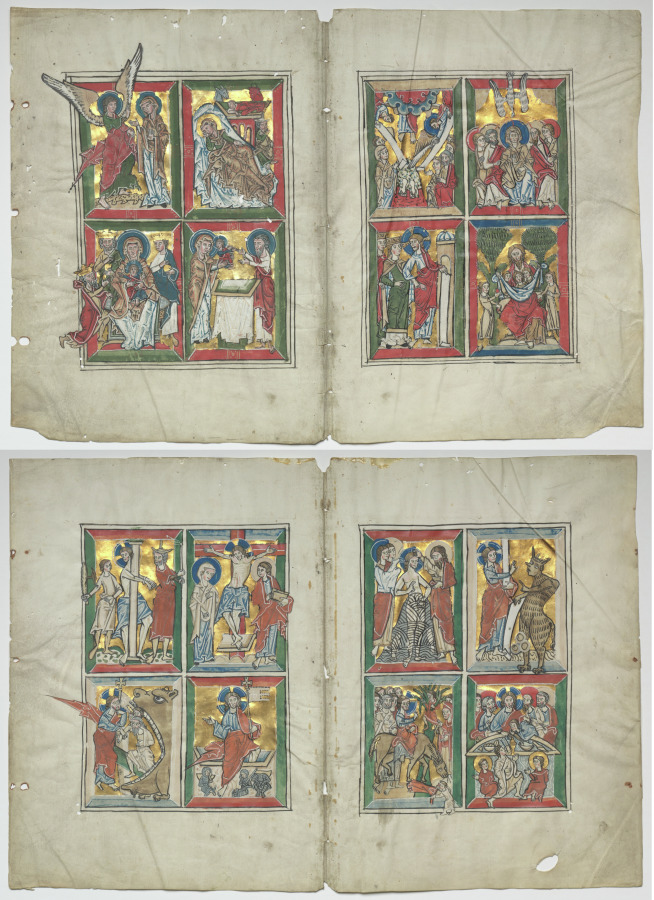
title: Bifolia with Scenes from the Life of Christ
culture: Germany, Lower Saxony (Diocese of Hildesheim), Braunschweig(?), 13th century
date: 1230–1240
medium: tempera, and gold on vellum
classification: Manuscript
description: This pair of bifolia consists of two sheets of vellum each folded in half to create four leaves. In the bound volume, they would have originally been inserted one inside the other to form part of a large psalter or book of the psalms. The miniatures decorating each leaf are subdivided into four small panels and sequentially illustrate the life of Christ. This particular format, along with aspects of style, help us locate the psalter’s place of production to North Germany and the Diocese of Hildesheim. In northern Europe, after 1050, a tradition emerged of illustrating psalters with miniature cycles of the life of David (the author of the Psalms) and the life of Christ. This juxtaposition implied the connection of lineage, since Christ was the descendant of the House of David. It is possible that in the parent volume these miniatures were accompanied by a “David” cycle.